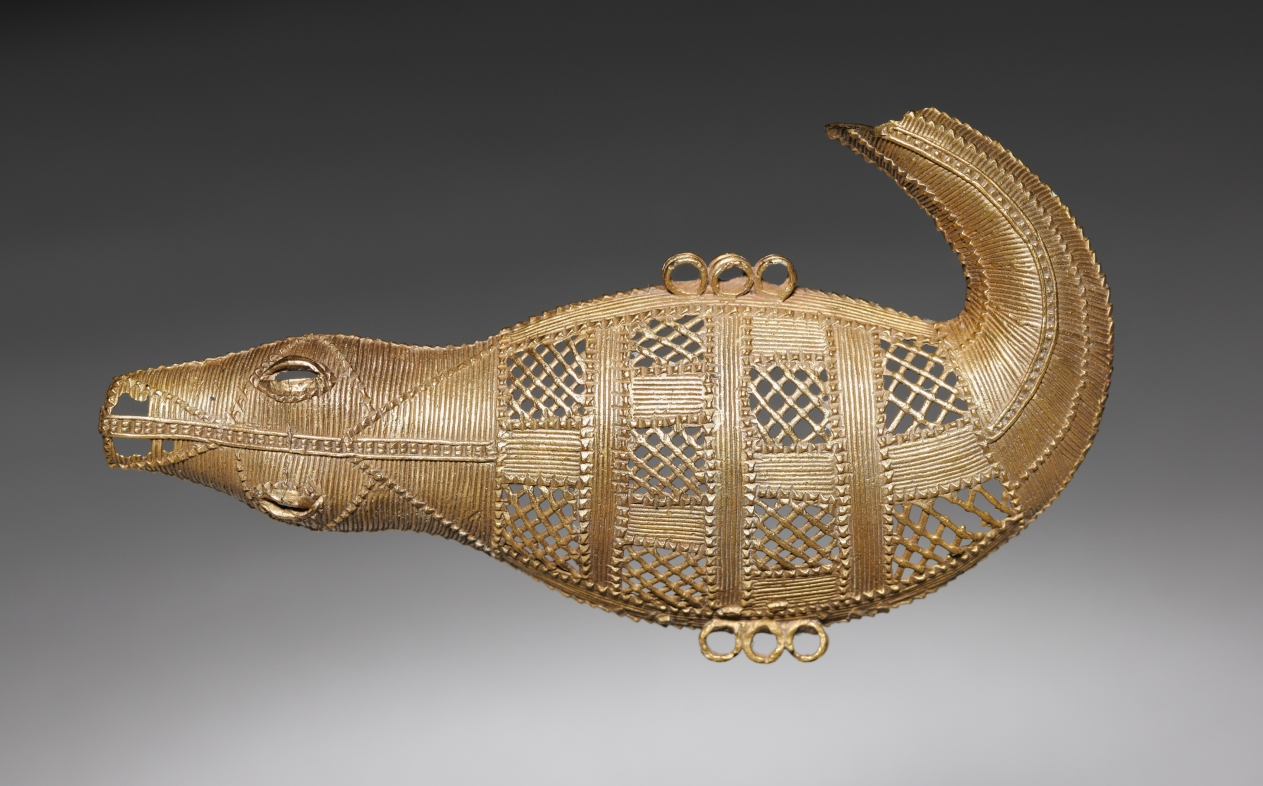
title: Pendant: Crocodile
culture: Africa, West Africa, Côte d'Ivoire, probably Baule-style goldsmith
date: 1930 or earlier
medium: Gold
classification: Jewelry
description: This pendant was cast in gold using the lost-wax method. Gold objects are the only Baule art forms associated with ancestor spirits. Pendants can have many uses. Usually hidden in pots or suitcases, gold adornments can be displayed on important occasions such as funerals. They can be laid out around the corpse before burial. A widow will wear them on a chain around her neck or attached to her hair at the ceremony signaling the end of mourning.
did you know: A goldsmith had to create superfine rolls of wax to make the texture of this piece; the wax was used to make a mold into which liquid gold was poured.